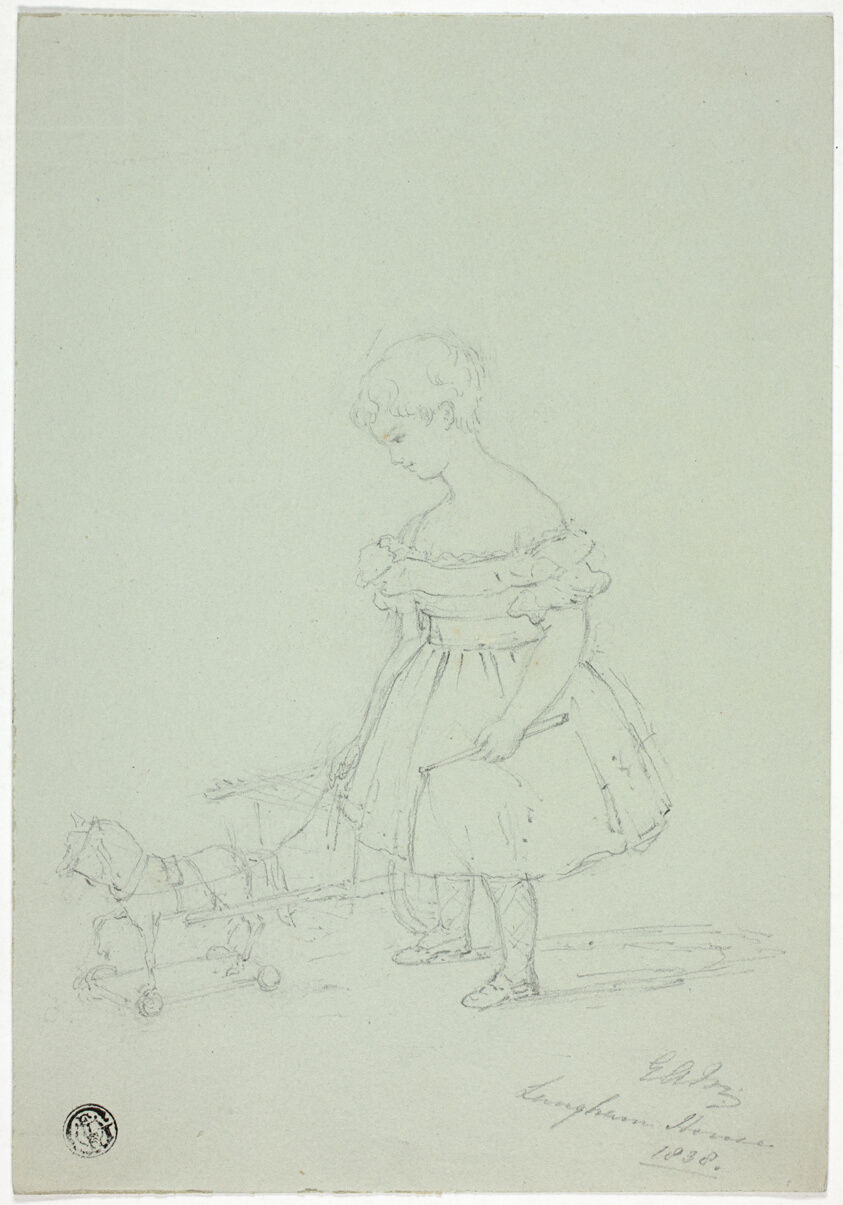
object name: Drawing and Watercolor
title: Girl with Toy Horse at Langham House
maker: Elizabeth Murray (English, c. 1815-1882)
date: 1838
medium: Graphite on blue wove paper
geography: England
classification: graphite; drawings (visual works); prints and drawing